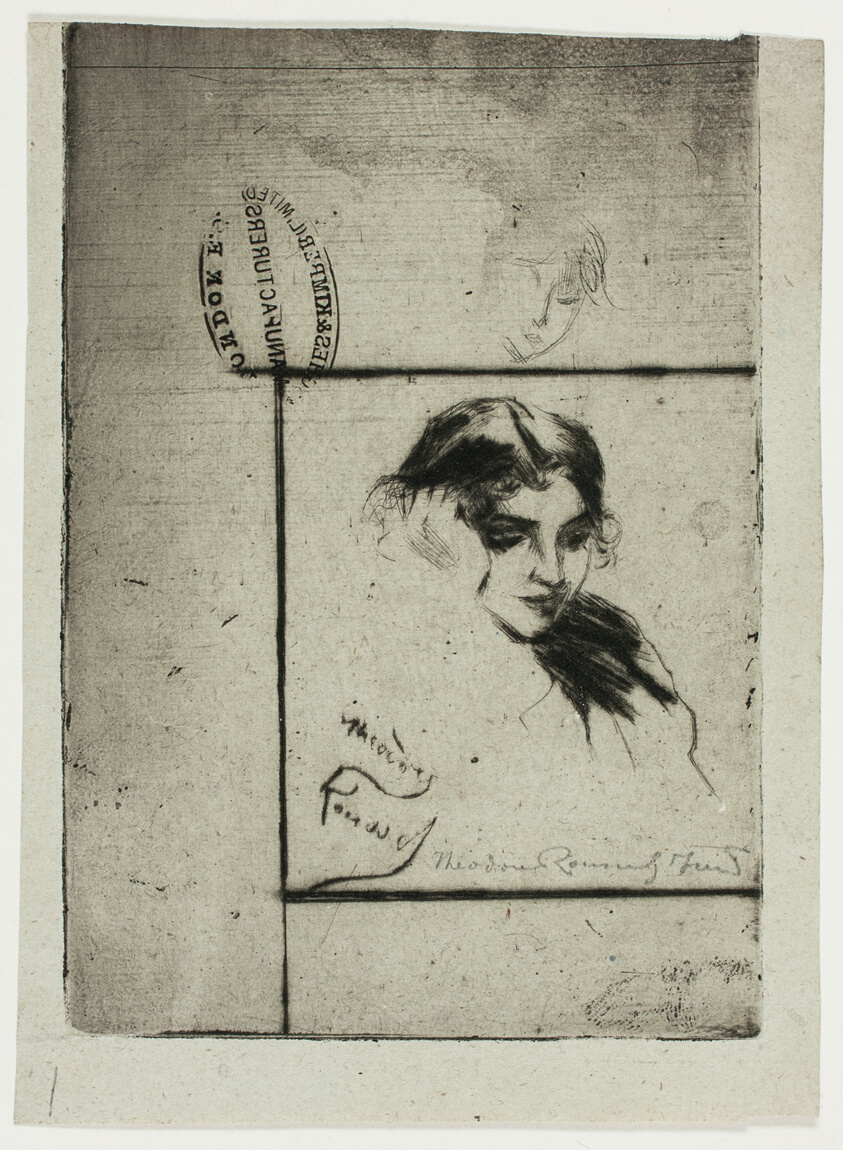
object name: Print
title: Head of a Girl Leaning on Her Hand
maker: Theodore Roussel (French, worked in England, 1847-1926)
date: 1895/1900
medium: Drypoint in black, with plate tone, on thin gray wove paper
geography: England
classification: drypoint; print; prints and drawing